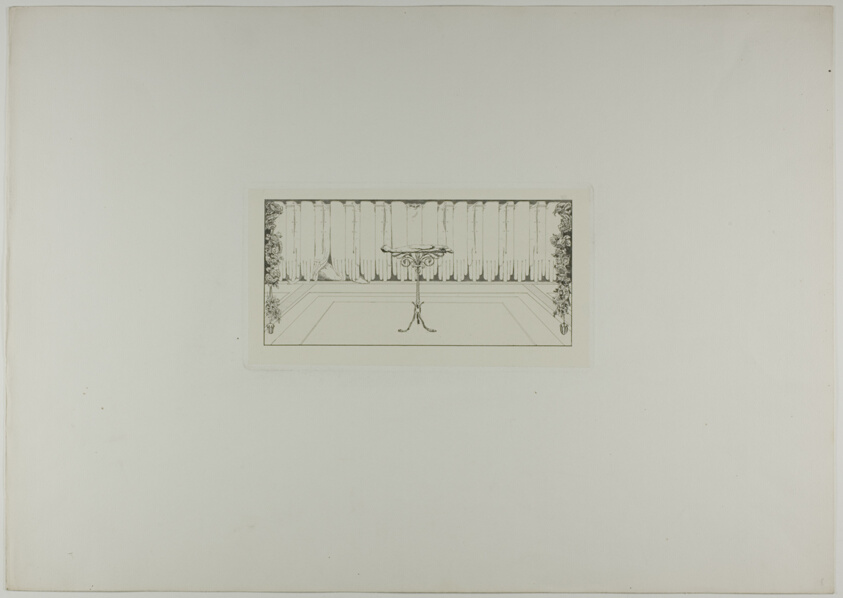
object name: Print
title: Quiet, plate eight from A Glove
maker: Max Klinger (German, 1857-1920)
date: 1881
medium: Etching on ivory chine collé on off-white wove paper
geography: Germany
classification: etching; print; prints and drawing